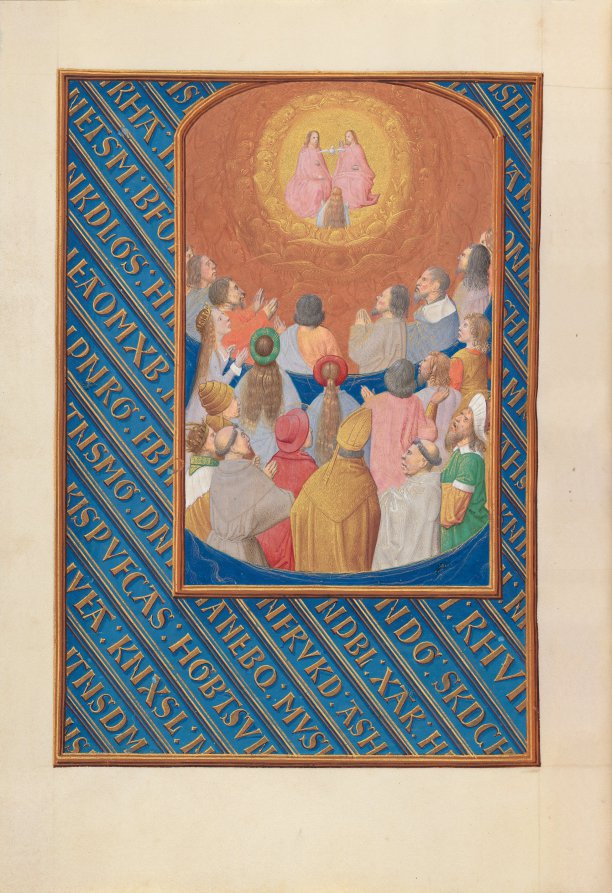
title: Hours of Queen Isabella the Catholic, Queen of Spain: Fol. 37v, Court of Heaven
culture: Flanders, Ghent and Bruges, late 15th century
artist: Master of the First Prayerbook of Maximillian (Flemish, c. 1444–1519)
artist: and Associates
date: c. 1500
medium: ink, tempera, and gold on vellum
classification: Bound Volume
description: This manuscript was illuminated by a circle of at least five highly organized manuscript painters active in the Flemish cities of Ghent and Bruges. The principal illuminator was Alexander Bening, who painted the majority of the book's miniatures. Manuscripts produced by this circle of artists are renowned for the decoration of their borders, which typically feature a rich variety of realistically-painted flowers, birds, and butterflies. This prayer book, called a book of hours, was intended not for a cleric, but for the private devotions of a lay person-in this case, Isabella the Catholic, Queen of Spain (1451-1504). Isabella's coat of arms embellishes the book's frontispiece. It is unlikely that the book was commissioned by the Queen herself; rather, she probably received it as a diplomatic gift from someone courting her patronage, perhaps Cardinal Francisco Jimenez de Cisneros. A Franciscan friar, Jimenez was dependent upon Isabella for his advancement, first to the post of Queen's confessor in 1492, and then to Archbishop of Toledo in 1495.